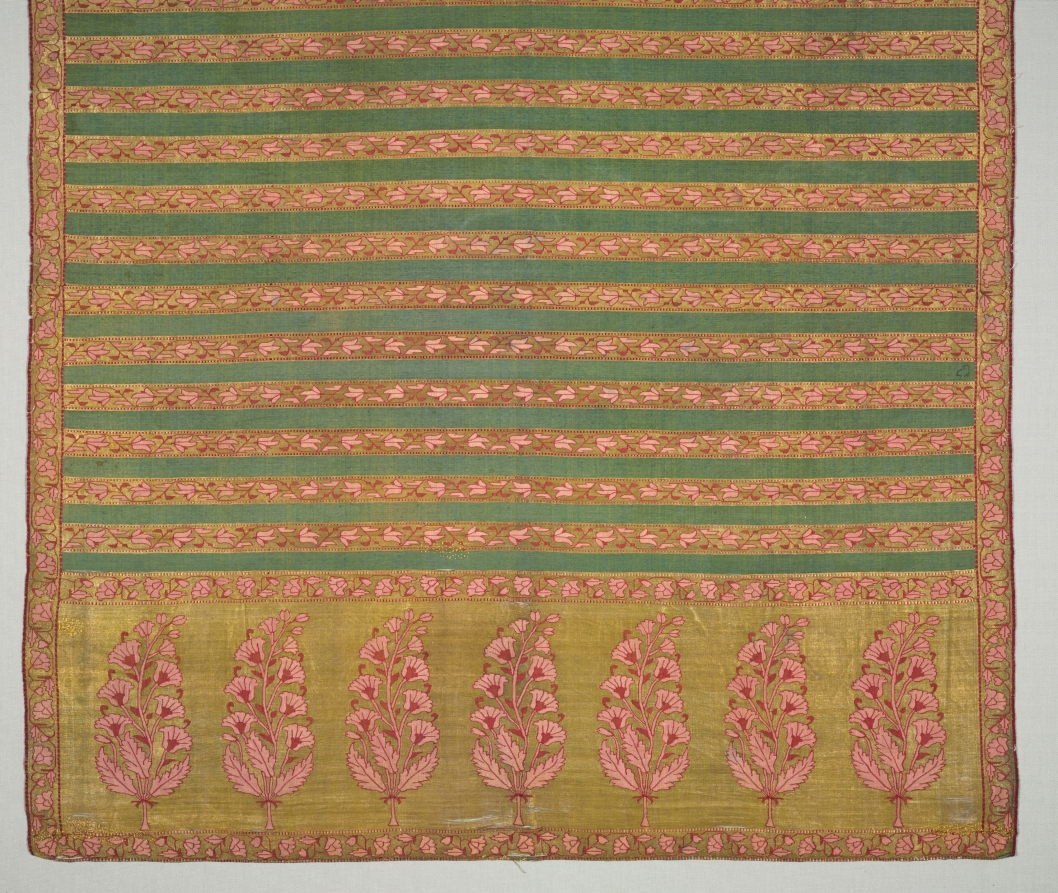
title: Sash with flora and banded field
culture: India, probably Aurangabad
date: 1700s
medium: tapestry weave, double interlocked: silk and gilt-metal thread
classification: Textile